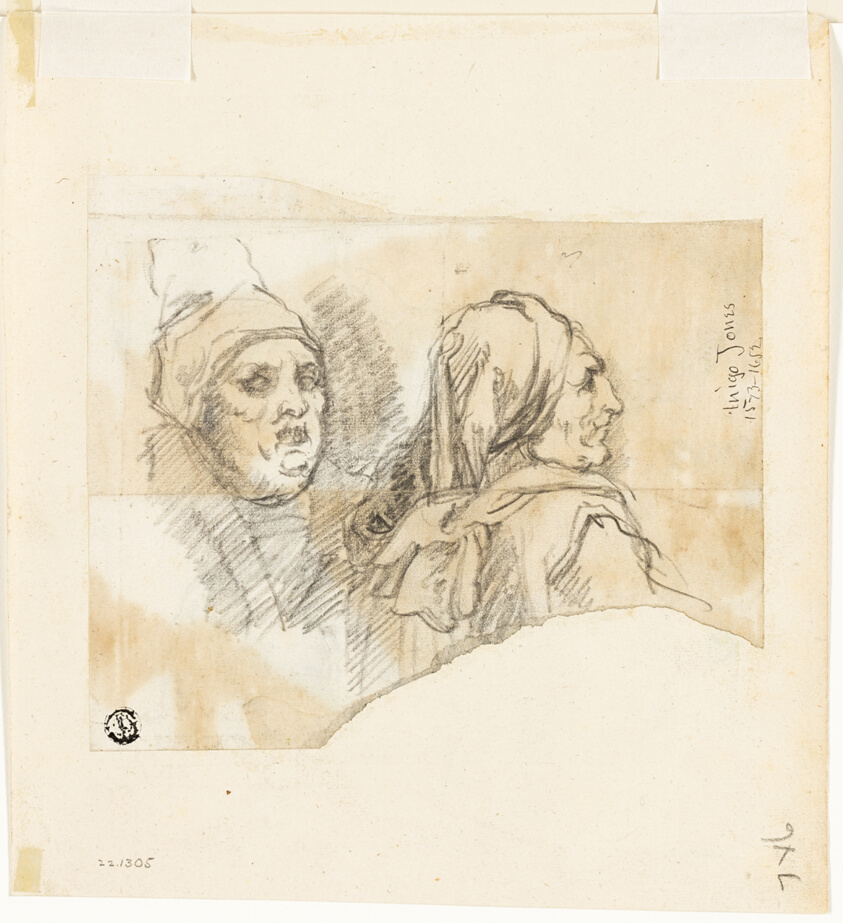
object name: Drawing and Watercolor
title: Sketches of Male Heads (recto); Two Old Women (verso)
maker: Thomas Patch (English, 1725-1782); or Inigo Jones (English, 1573-1652)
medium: Black chalk (recto and verso) on ivory laid paper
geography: England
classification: chalk; drawings (visual works); prints and drawing